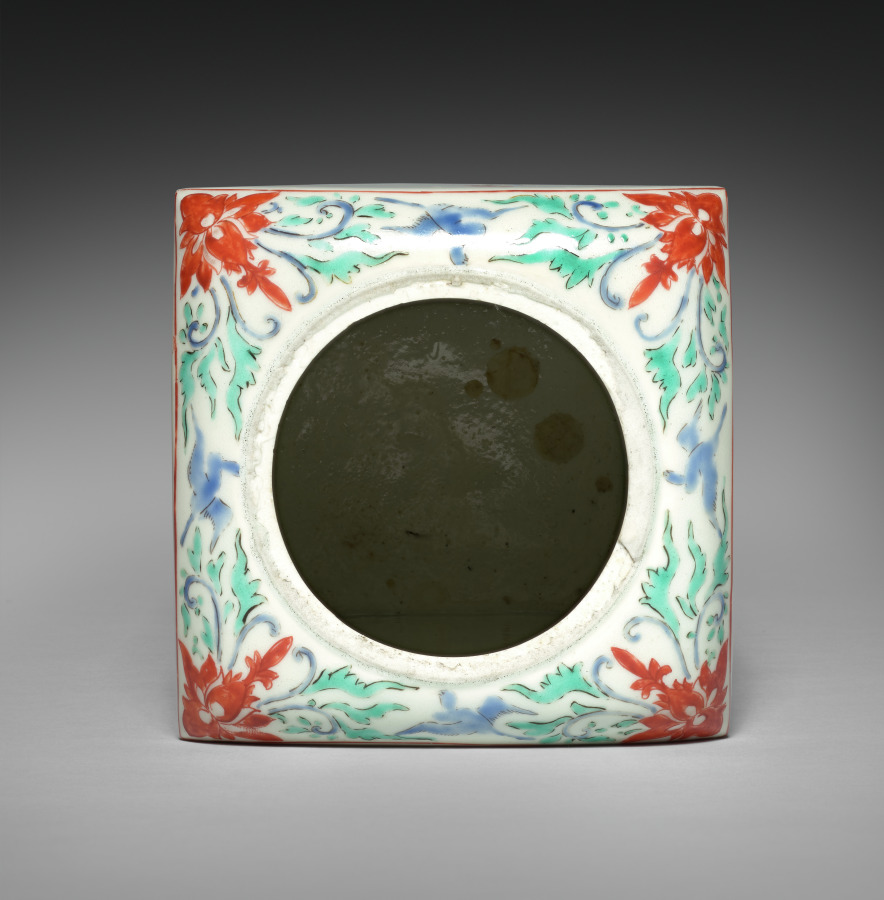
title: Square Jar with Birds and Flowers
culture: Japan, Edo period (1615–1868)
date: late 1600s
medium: Porcelain with overglaze color enamels and gold (Hizen ware, Kakiemon type)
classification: Ceramic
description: This lidded square jar was likely paired with a complementary yet nonidentical mate. The pine tree, plum, and bamboo together form the frequently depicted motif known as the Three Friends of Winter (shōchikubai), so named because of their hardy perseverance in the cold. Each side also features a pair of birds, including cranes on one face and pheasants on another.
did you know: A jar like this was fired at a high temperature, painted with colored enamels, and then fired again at a lower temperature.